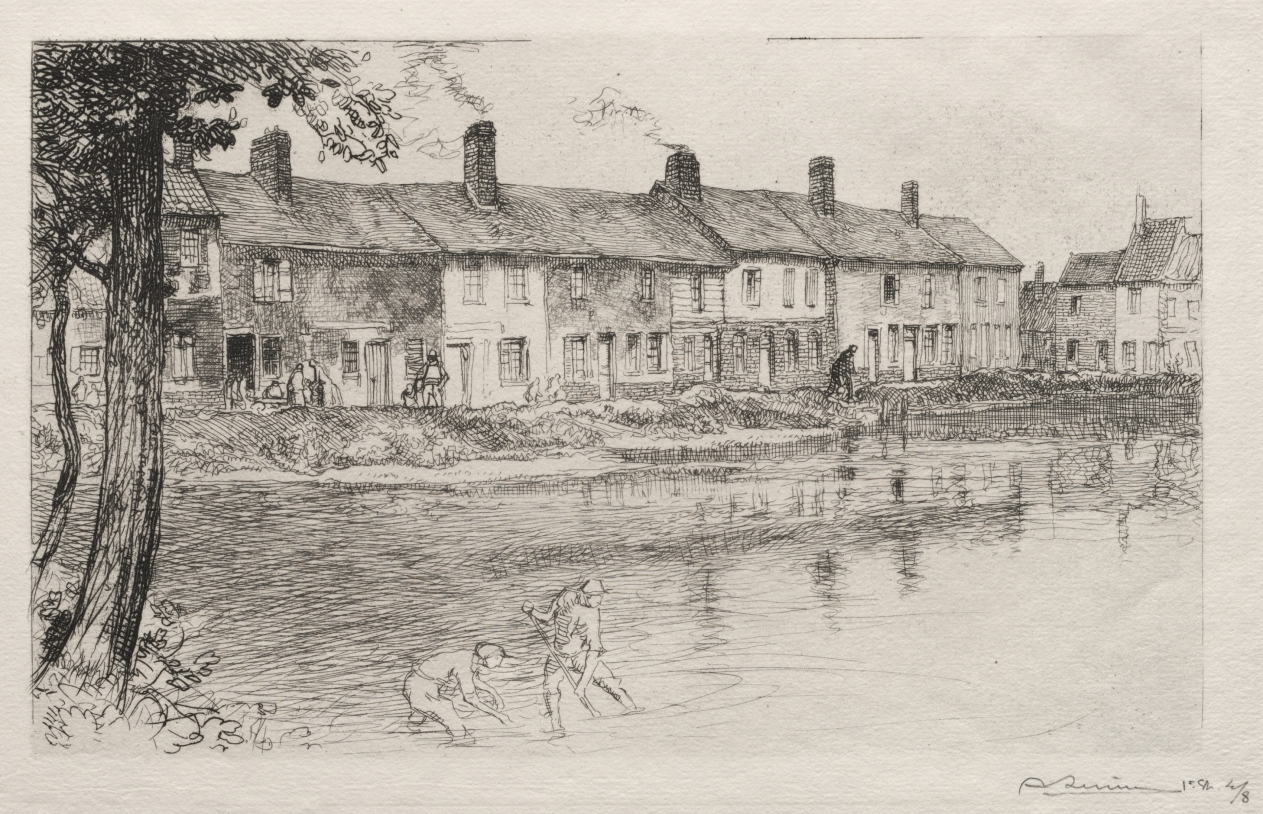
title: La Mare de la Prairie, Crèvecoeur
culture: France, 20th century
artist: Auguste Louis Lepère (French, 1849–1918)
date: 1913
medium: etching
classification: Print